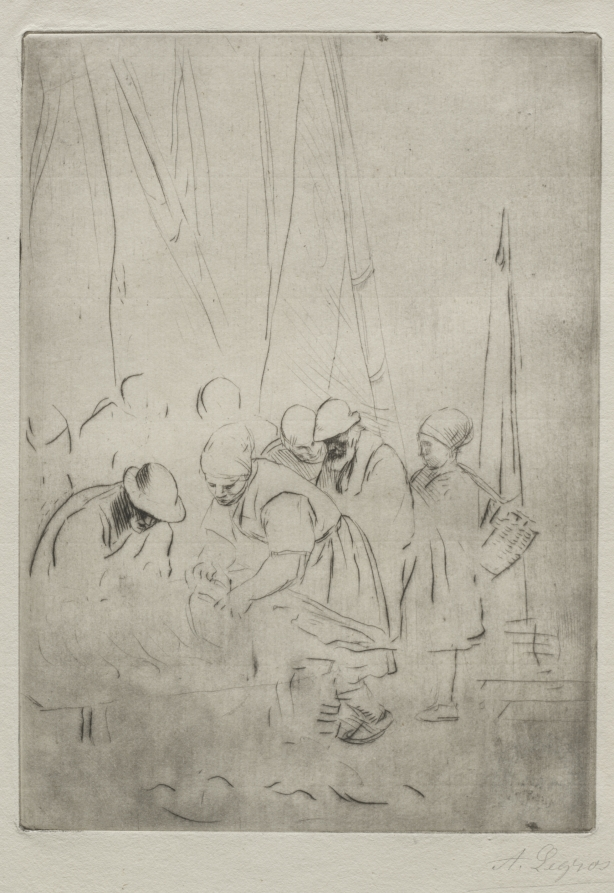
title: Fishermen on the Wharf at Boulogne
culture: France, 19th century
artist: Alphonse Legros (French, 1837–1911)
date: c. 1857–1911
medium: drypoint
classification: Print